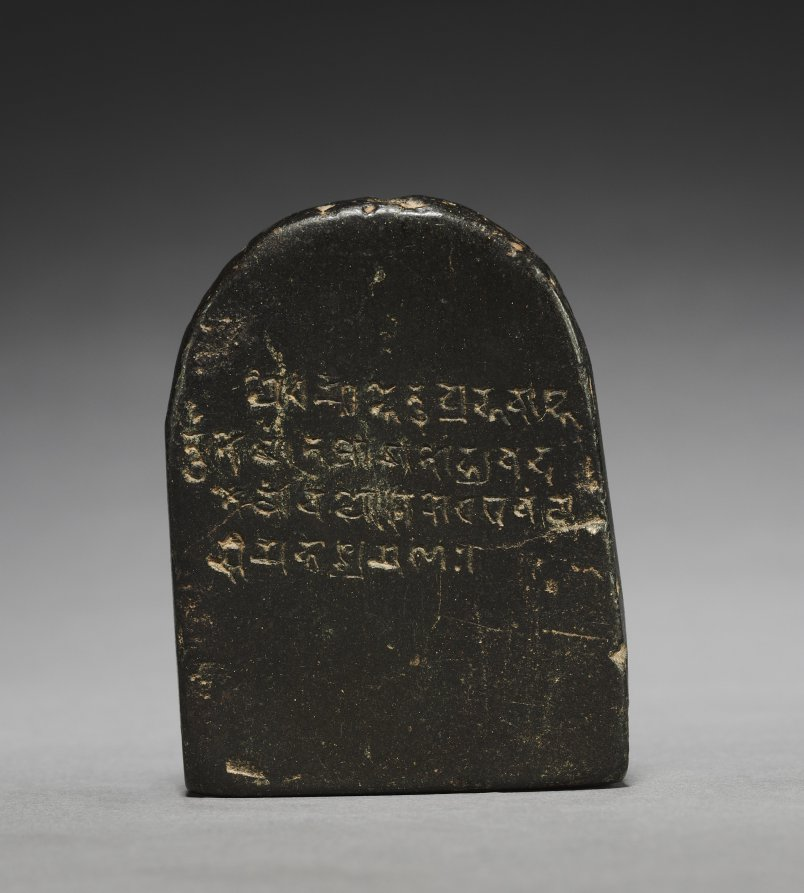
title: Stele with Padmapani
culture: India, Nalanda, Pala Period, 10th Century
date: 900s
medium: black chlorite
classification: Sculpture